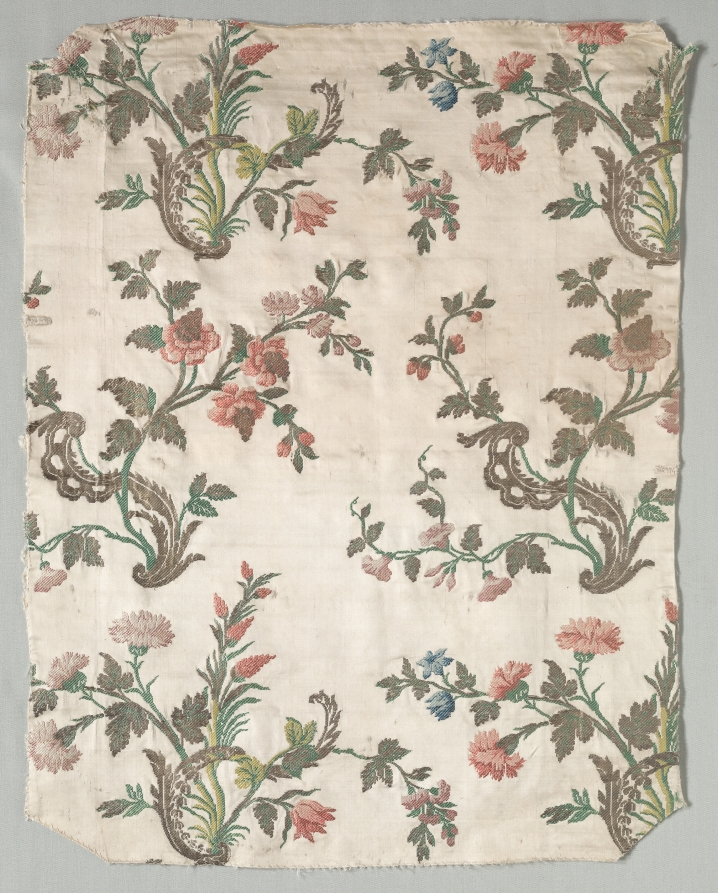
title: Fragment of Satin Brocade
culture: France, 18th century, Period of Louis XV (1723-1774)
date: mid 1700s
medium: brocaded satin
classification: Textile